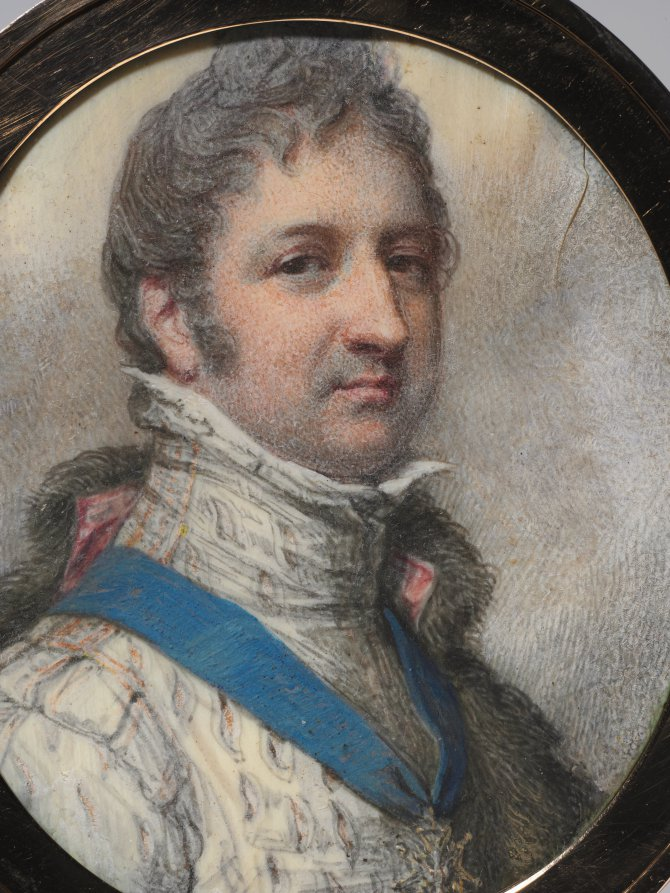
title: Portrait of Louis-Philippe, Duke of Orléans, later King of the French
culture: England, early 19th Century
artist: Richard Cosway (British, 1742–1821)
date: 1804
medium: watercolor on ivory in a gold locket frame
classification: Portrait Miniature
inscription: signed on backing: Rdus Cosway / R.A. et F.S.A. / Primarius Pictor / Serenissimi Walliae / Principie / Pinxit / 1804.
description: Louis-Philippe (1773–1850, king of the French 1830–48) was the son of Louis-Philippe Joseph, duc d’Orléans, who was known as Philippe-Egalité during the French Revolution. The Orléans family was a branch of the House of Bourbon. This work was painted while Louis-Philippe was in exile and living in England from 1800 until 1815, when Napoleon abdicated. He finally succeeded Charles X as king of France in 1830. During the February Revolution of 1848, Louis-Philippe was again forced into exile in England where he died two years later. Richard Cosway had painted Louis-Philippe (as well as his siblings and father) when the family was in England immediately following the outbreak of revolution in 1789. Louis-Philippe would have been thirty-one years old when this work was executed. He wears the Order of the Holy Spirit, a chivalric order of the French monarchy, which can be distinguished by its white dove surrounded by green flames at the center of a Maltese cross, with fleur-de-lis between the arms of the cross. Instead of the brilliant turquoise and white cloud background traditionally associated with Cosway, this miniature has the more restrained, gray, hatched background that characterizes the artist’s later works. The surface of the work is much marred by an irreversible crystallization of the paint layer that further emphasizes the gray tones throughout. The form of the unmarked case is typically English, but the motif is French, which may indicate a French goldsmith imitating the English style. The motif resembles a swan composed of foliate scrolls. A lock of plaited brown hair is also enclosed under glass within the locket, facing the miniature.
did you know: Without DNA analysis it is impossible to know to whom the hair belonged, though the most likely candidate is Louis-Philippe himself.